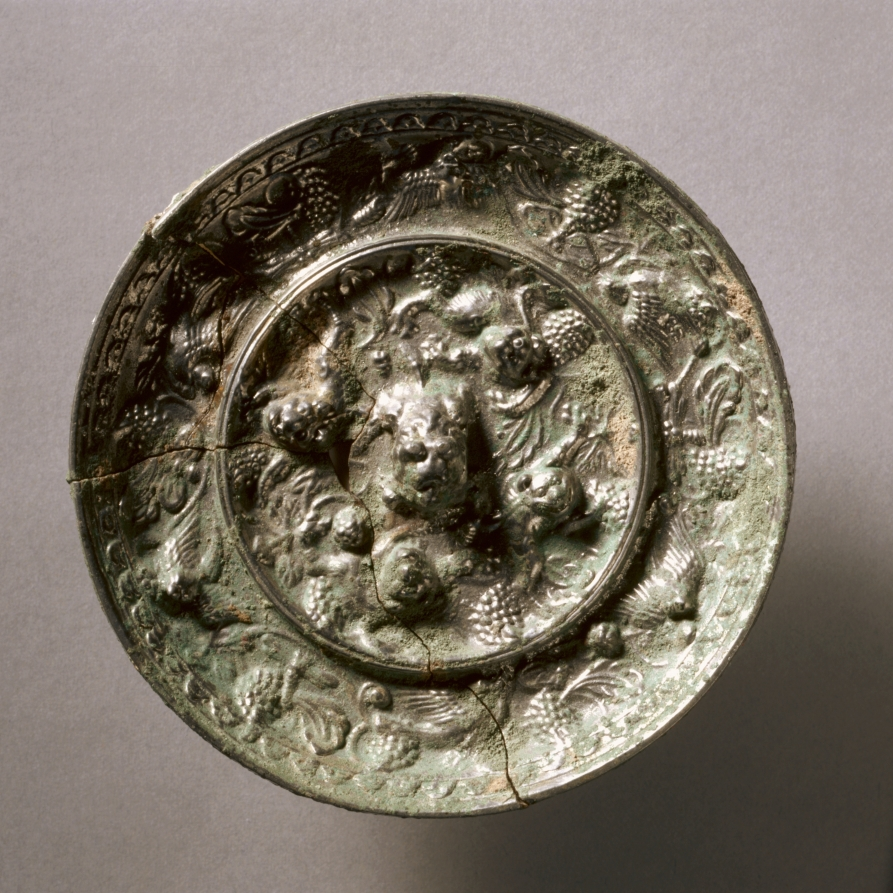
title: Animal-and-Grape Mirror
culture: China, Tang dynasty (618-907)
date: early 600s–early 900s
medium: bronze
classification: Metalwork